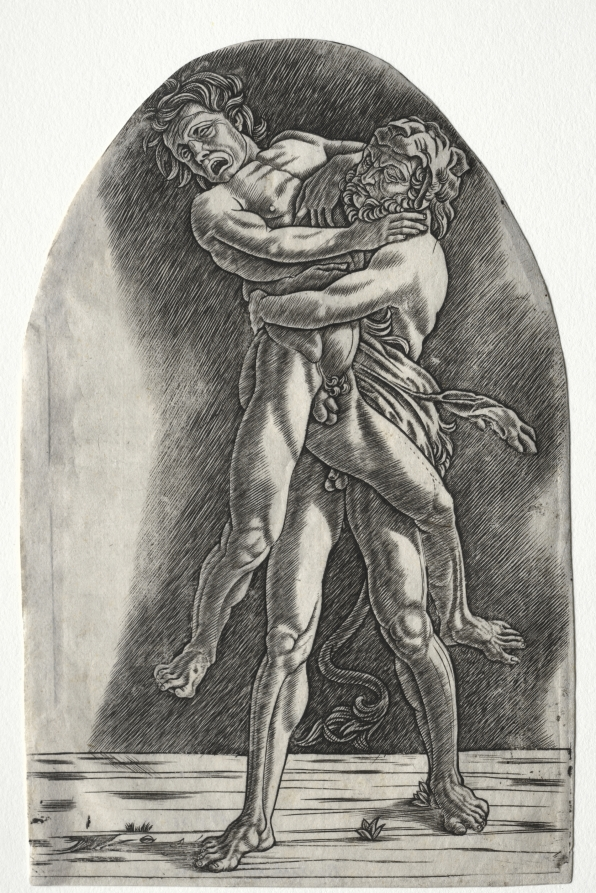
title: Hercules and Antaeus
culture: Italy, 16th century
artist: Master of the Year 1515 (Italian)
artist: probably by Agostino Busti (Italian, 1483–1548)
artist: after Andrea Mantegna (Italian, about 1431–1506)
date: c.1510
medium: engraving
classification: Print